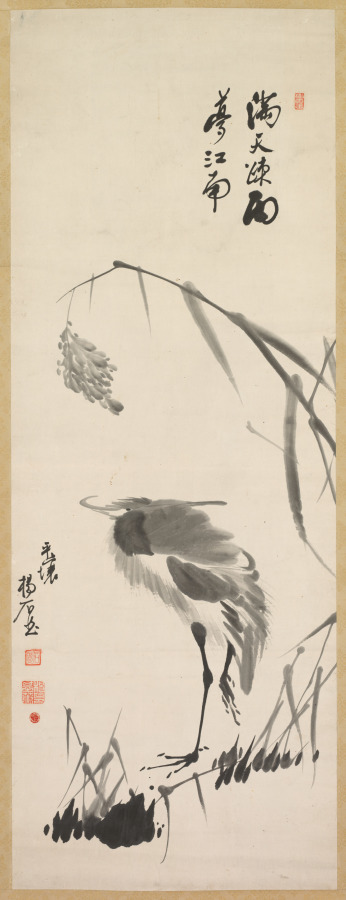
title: Egret and Reeds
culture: Korea, Joseon dynasty (1392–1910)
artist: Yang Ki-hun (Seuk-Eun) (Korean, 1843–1919?)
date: late 1800s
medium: hanging scroll; ink on paper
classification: Painting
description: In this hanging scroll, an egret walks along the shores of a salt marsh where reeds abundantly grow. Native to Pyongyang, the artist Yang Ki-hun had no rival in bird-and-flower themes. The Taedong River estuary, one of Pyongyang’s beloved natural sites, may have been Yang’s favorite spot to observe and sketch various water birds. Yang treated his subjects of flora and fauna with an observant naturalist’s view, yet his choice of subjects—an egret and reeds—is deeply rooted in traditional symbolic language: the egret stands for the scholarly reclusive life, while reeds indicate humility and modesty.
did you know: Yang Ki-hun was one of the most commercially successful painters known for decorative bird-and-flower subjects.